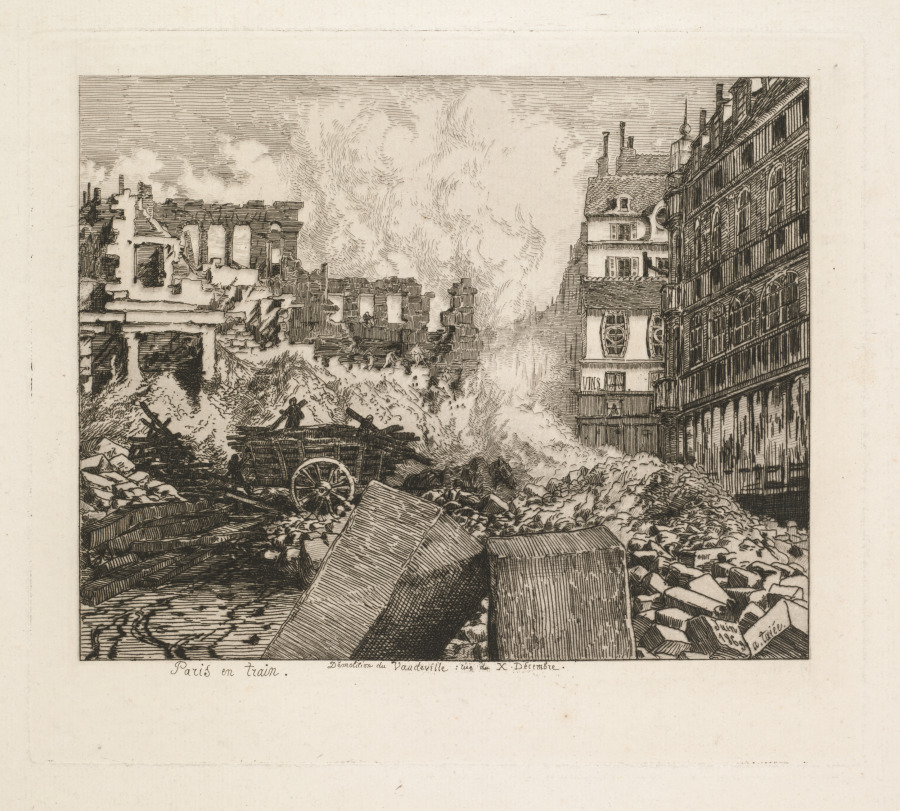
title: Paris en Train. Démolition du théâtre du Vaudeville: rue du Dix-Decembre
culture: France, 19th century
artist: Alfred Taiée (French, 1820–1881)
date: 1869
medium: etching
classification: Print